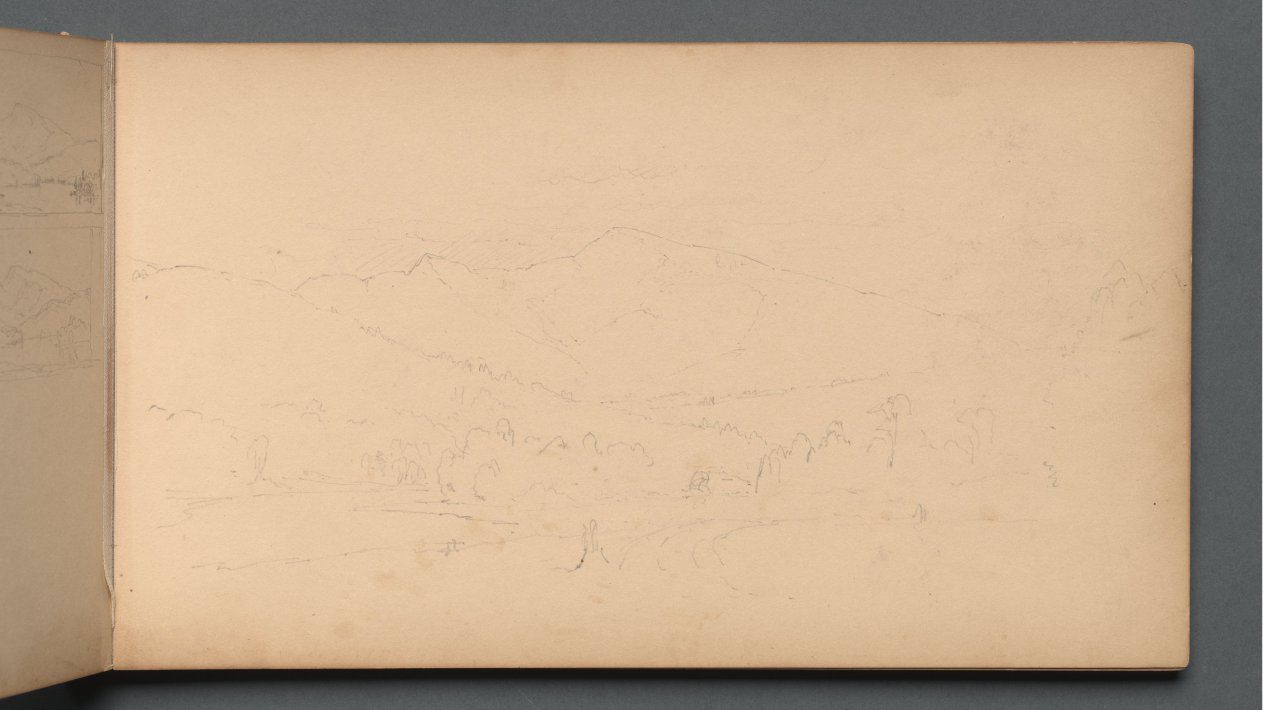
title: Sketchbook, page 10: Carter Mountian (?)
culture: America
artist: Sanford Robinson Gifford (American, 1823–1880)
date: 1859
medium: graphite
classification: Bound Volume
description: Gifford was an American landscape painter belonging to the second generation of Hudson River school artists. Based in New York City with a studio at the Tenth Street Studio Building, Gifford took annual summer trips to the Catskills, the Adirondacks, and other scenic locations in New England. This sketchbook accompanied the artist on his expedition in 1859 to New Hampshire and Maine, where he drew sites such as Dixville Notch, the White Mountains, and Peaks Island, Casco Bay. Gifford used such graphite studies as the basis for oil paintings worked up in his studio, such as A Home in the Wilderness (1866).